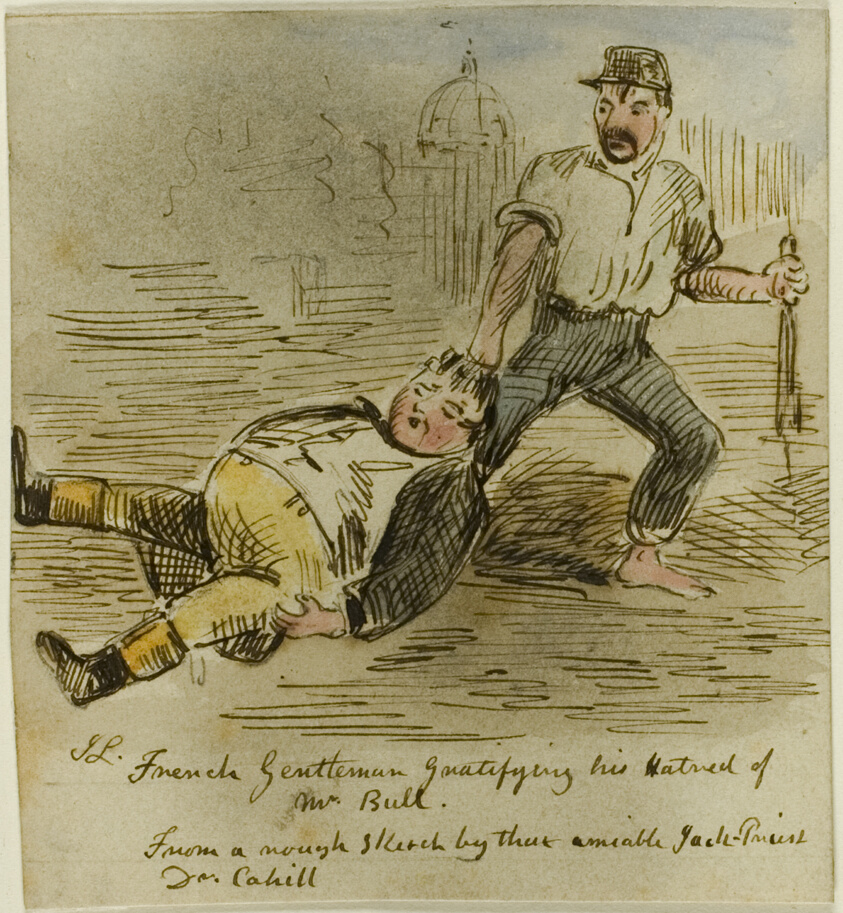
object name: Drawing and Watercolor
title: French Gentleman Gratifying His Hatred of Mr. Bull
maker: John Leech (English, 1817-1864)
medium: Watercolor and pen and brown ink, over graphite, on cream wove paper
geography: England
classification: watercolor; drawings (visual works); prints and drawing